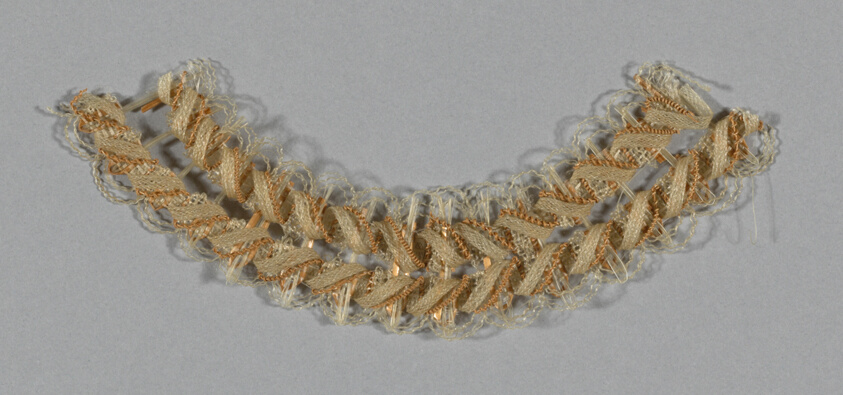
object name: Textile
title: Fragment (Bonnet Trim)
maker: Probably Europe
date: c. 1850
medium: Silk, horsehair, and straw, plain weave; openwork with raised profile formed by extended, wrapped and twill oblique interlaced wefts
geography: Europe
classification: textile; headdress - misc; costume accessory - headdress